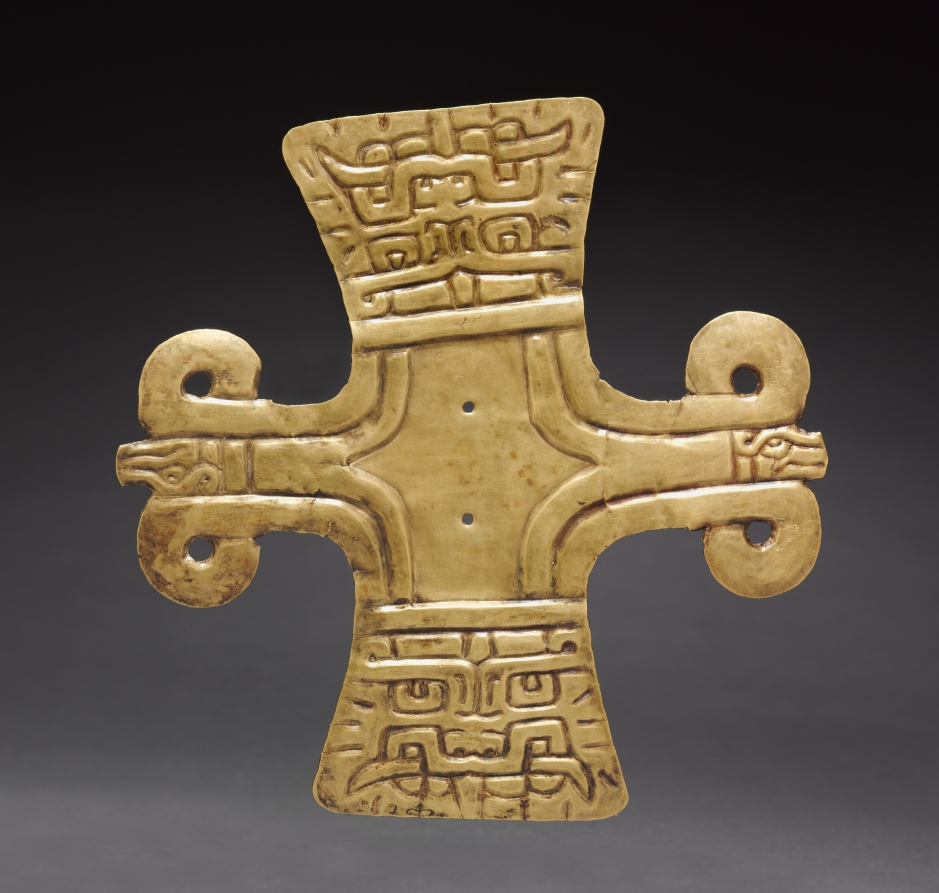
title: Cross-Shaped Ornament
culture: Peru, North Highlands, Chavín de Huantar(?), Chavín style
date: c. 500–200 BCE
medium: hammered and cut gold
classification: Metalwork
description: There seems to be a link between Chavín religion and appearance of the Andes’ first large precious-metal objects, made using revolutionary new metallurgical processes. Chavín may have developed these technical innovations to express the inexpressible, the "wholly other" nature of its religion. In many areas, elite men and women wore the ornaments as emblems of their ties to this religion, and eventually were buried with them. These 16 objects, along with three others not in the museum’s collection, are said to have come as a group from Chavín itself.